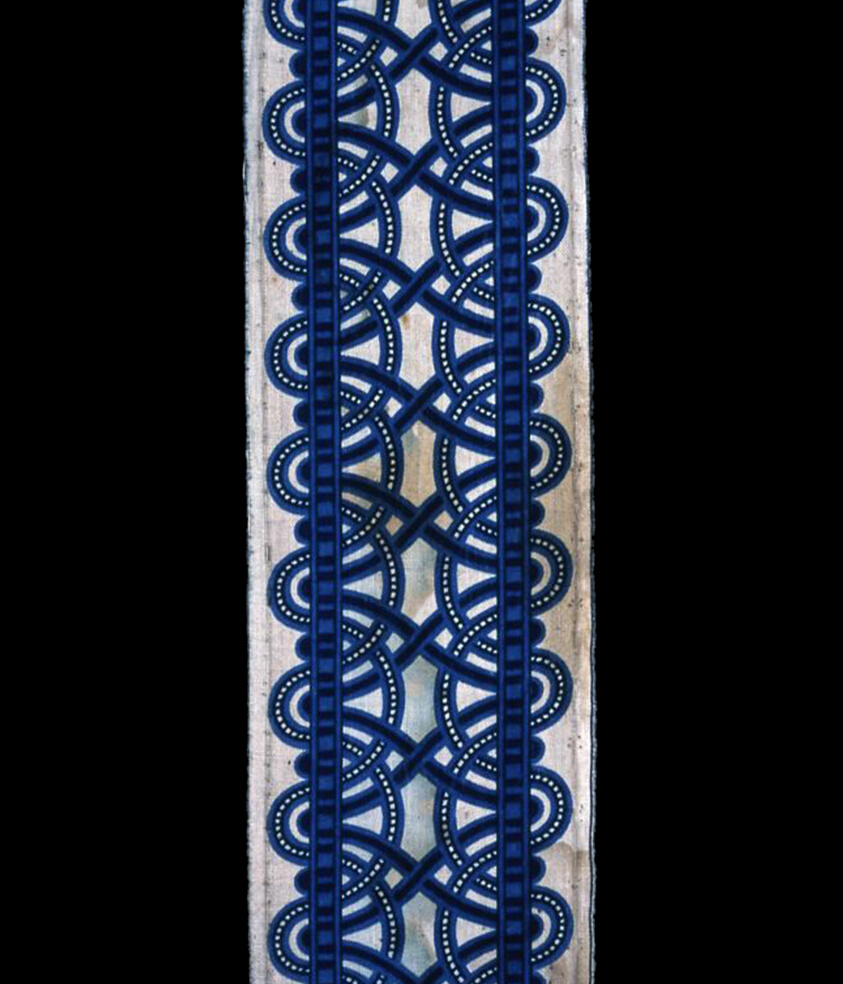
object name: Textile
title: Border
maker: England or United States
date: 19th century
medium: Cotton, plain weave; block printed; glazed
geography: England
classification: textile; weaving - printed